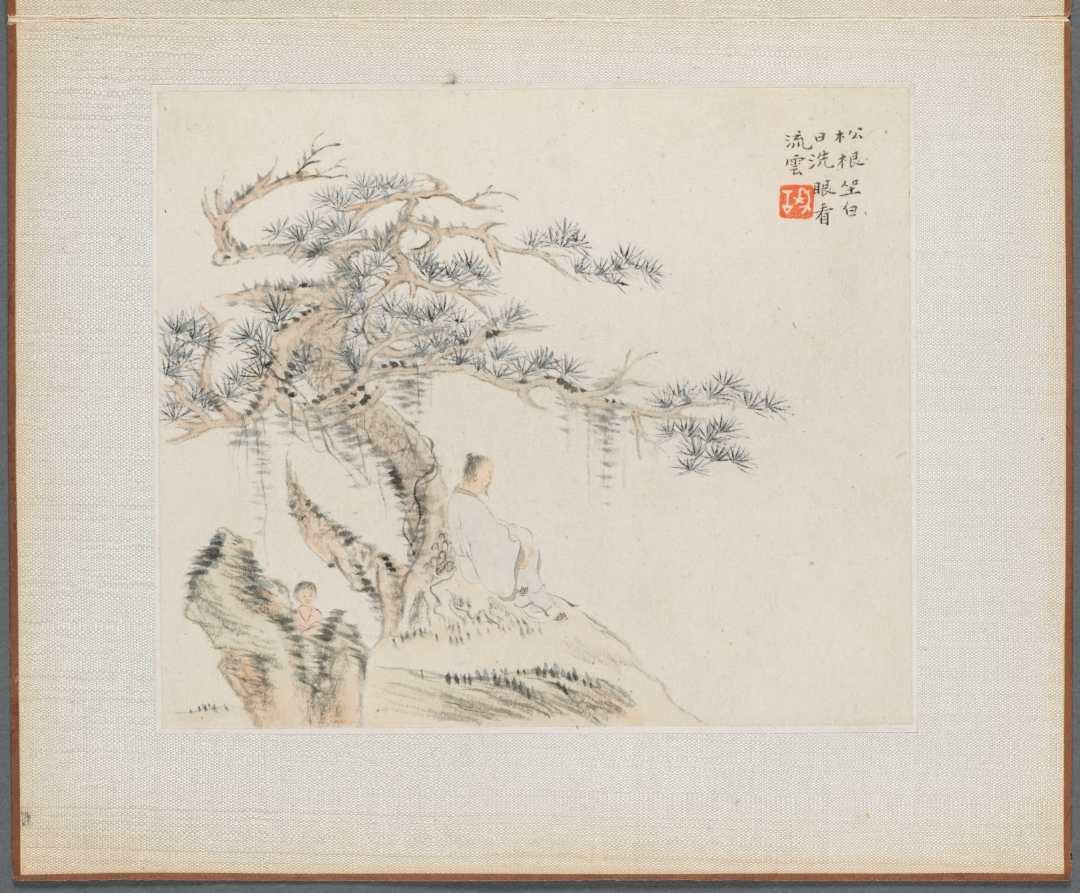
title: Album of Landscape Paintings Illustrating Old Poems: Scholar under a Pine Tree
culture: China, Qing dynasty (1644–1911)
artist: Hua Yan (Chinese, 1682–c. 1765)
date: 1745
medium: album leaf, ink and light color on paper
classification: Painting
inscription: In the daytime, I sit on the root of a pine tree, I wash my eyes to watch the floating clouds." not signed, with a seal of the artist.